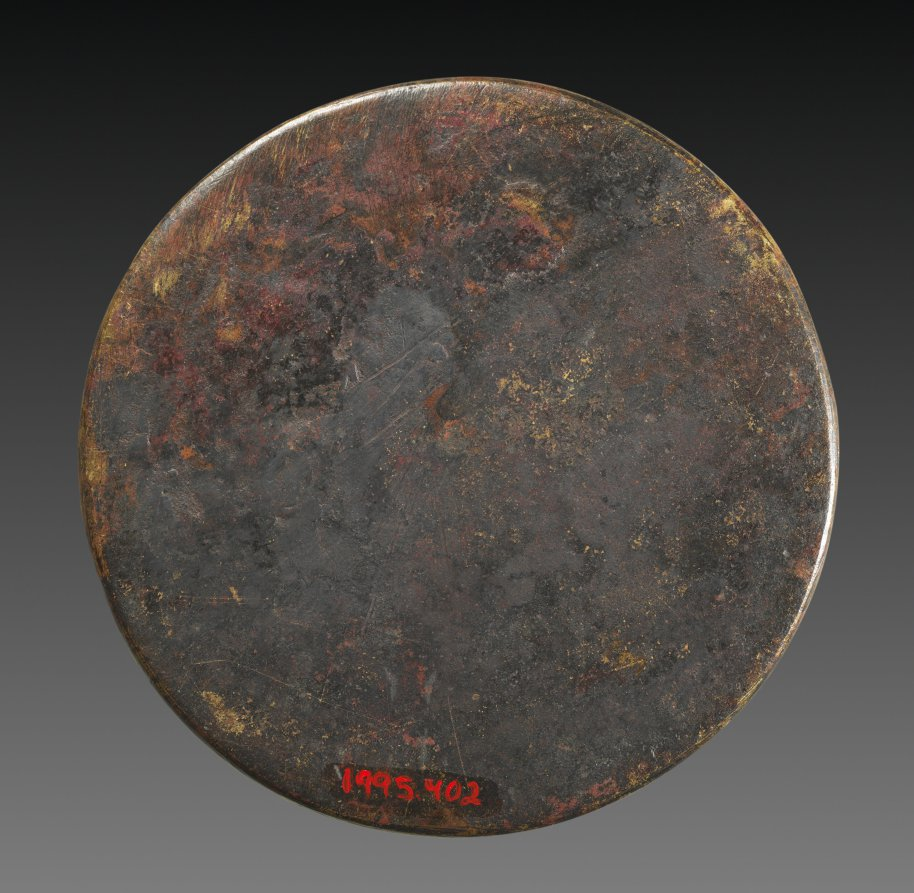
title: Mirror with Addorsed Sphinxes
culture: Eastern Anatolia or Northern Mesopotamia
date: 1200s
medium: Cast bronze with relief decoration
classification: Metalwork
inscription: Arabic inscription in degenerate floriated angular script around rim. Inscription is poorly written, but is identical to that on mirrors in Kuwait al-Sabah Collection (LNS102M) and Musée des Arts Decoratifs (14918). Translation (from M. Jenkins, "The al-Sabah Collection," 1983, p. 69): Glory and continence and good fortune and splendor and high position and praise and happiness and nobility and power and increase and potency and blessings to its owner forever.